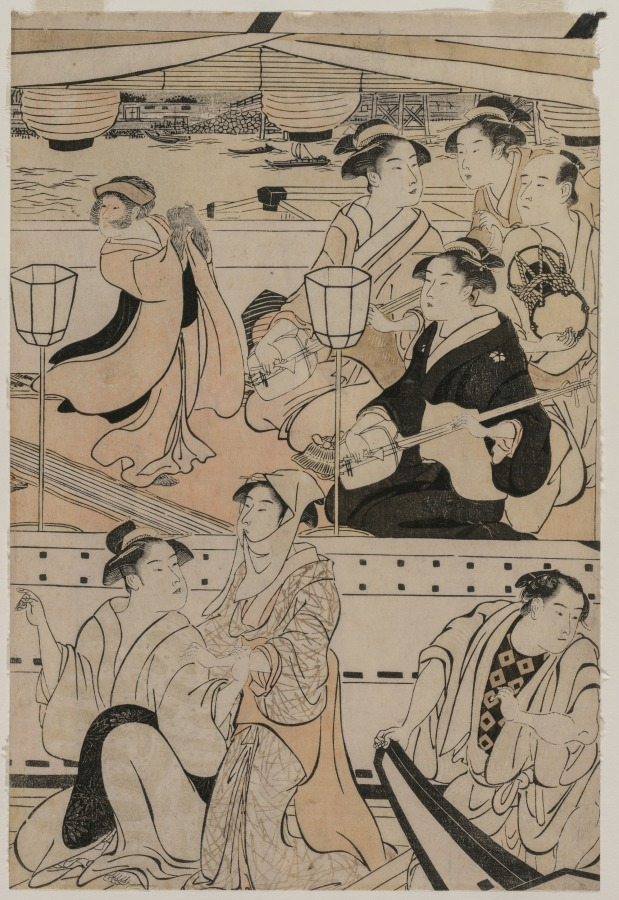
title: Boating Party on the Sumida River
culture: Japan, Edo period (1615–1868)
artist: Torii Kiyonaga (Japanese, 1752–1815)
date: 1789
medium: One of a triptych of color woodblock prints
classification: Print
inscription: Signature: Kiyonaga ga Publisher: Tsuruya Kihei (?) (emblem on lanters)